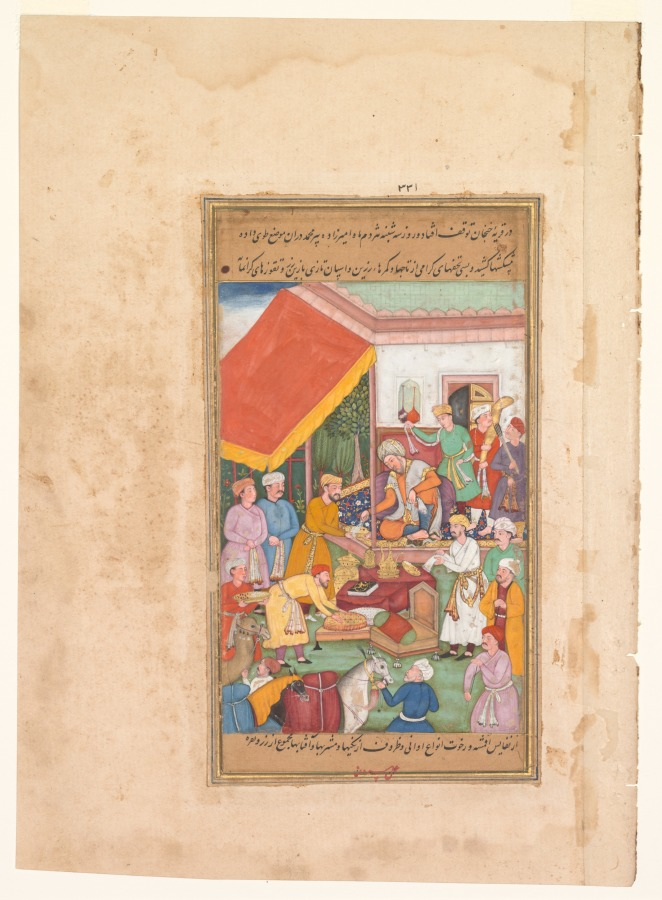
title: Timur distributes gifts from his grandson, the Prince of Multan, from a Zafar-nama (Book of Victories)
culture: Mughal India, court of Akbar (reigned 1556–1605)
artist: Shravana (Indian, active 1550s–c.1600)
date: 1598–1600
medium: Gum tempera, ink, and gold on paper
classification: Painting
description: The Turkic conqueror Timur (1336–1405) is the Mughal emperor Akbar’s most celebrated paternal ancestor. He sits on a terrace, shaded by a crimson awning. The blue carpet with gold border marking his high status is covered with a floral vine pattern that became fashionable in the 1500s. This scene takes place in a territory governed by Timur’s grandson, who sent him gifts of horses, camels, and a variety of luxury items. Timur is in the process of regifting them to members of his entourage in accordance with their merits.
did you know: Pre-modern giftwrap: Round textiles cover presentation platters.